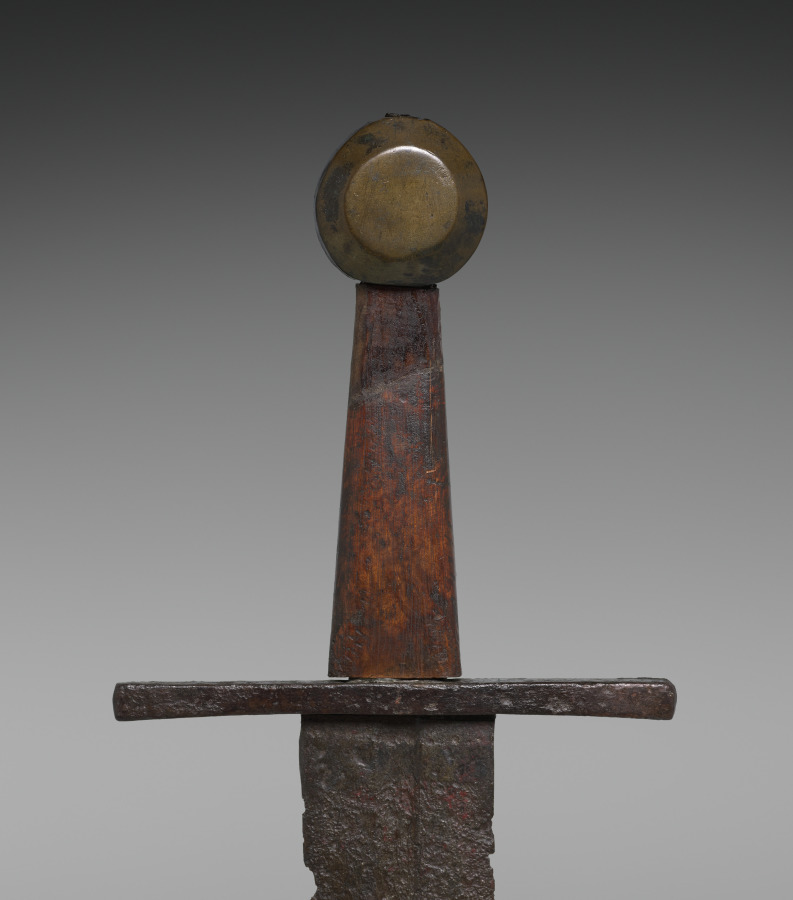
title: Sword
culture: Germany(?)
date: c. 1350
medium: iron; wood grip and brass pommel replacements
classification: Arms and Armor